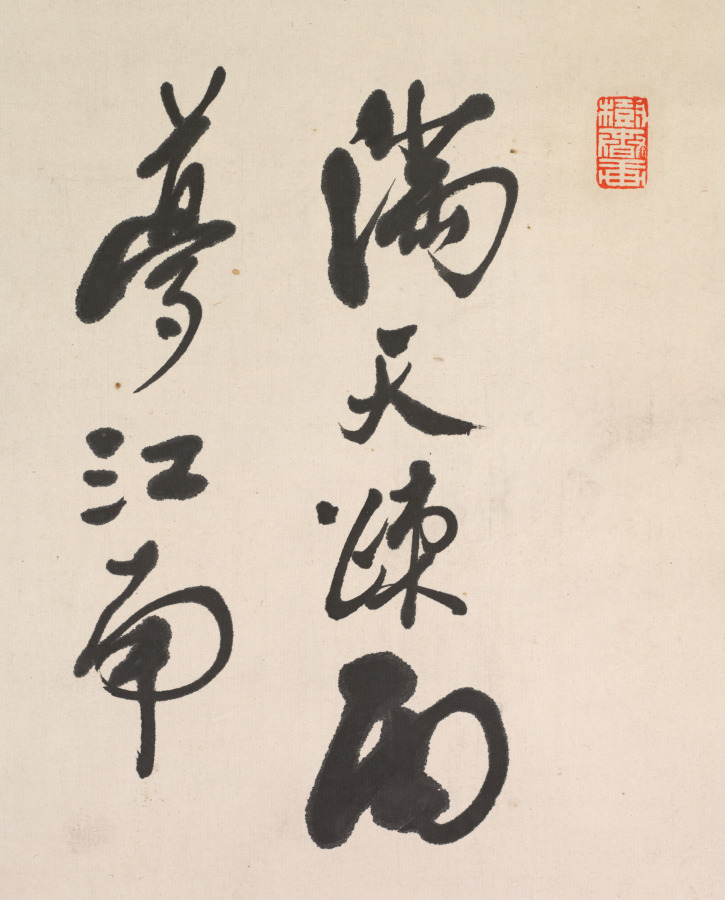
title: Egret and Reeds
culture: Korea, Joseon dynasty (1392–1910)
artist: Yang Ki-hun (Seuk-Eun) (Korean, 1843–1919?)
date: late 1800s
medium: hanging scroll; ink on paper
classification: Painting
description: In this hanging scroll, an egret walks along the shores of a salt marsh where reeds abundantly grow. Native to Pyongyang, the artist Yang Ki-hun had no rival in bird-and-flower themes. The Taedong River estuary, one of Pyongyang’s beloved natural sites, may have been Yang’s favorite spot to observe and sketch various water birds. Yang treated his subjects of flora and fauna with an observant naturalist’s view, yet his choice of subjects—an egret and reeds—is deeply rooted in traditional symbolic language: the egret stands for the scholarly reclusive life, while reeds indicate humility and modesty.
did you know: Yang Ki-hun was one of the most commercially successful painters known for decorative bird-and-flower subjects.